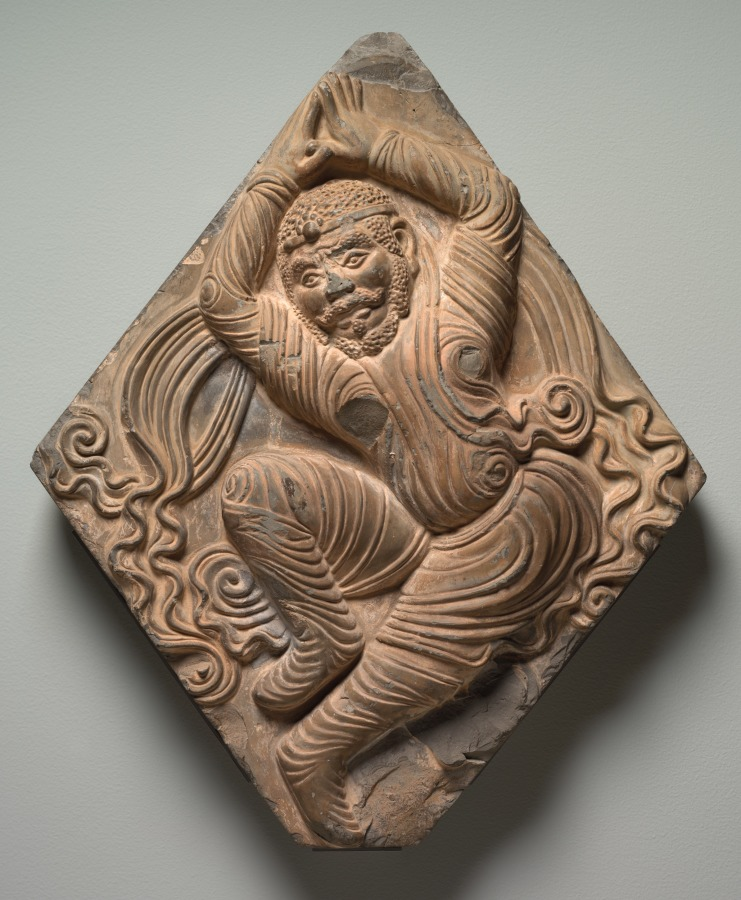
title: Architectural Brick with Dancer in Relief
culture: China, Henan Province, Anyang, Xiudingsi pagoda, Tang dynasty (618–907)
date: before 870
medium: molded terracotta with slip coating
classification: Ceramic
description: This brick originally formed part of the exterior wall of the pagoda at the Xiudingsi Buddhist monastery near Anyang, Henan province. The Xiudingsi pagoda, datable before 870 by an inscription carved on one brick, is the only building that survives from the once large monastic complex.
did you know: This bearded Western Asian figure is dancing with his scarf twisting into curling streamers.